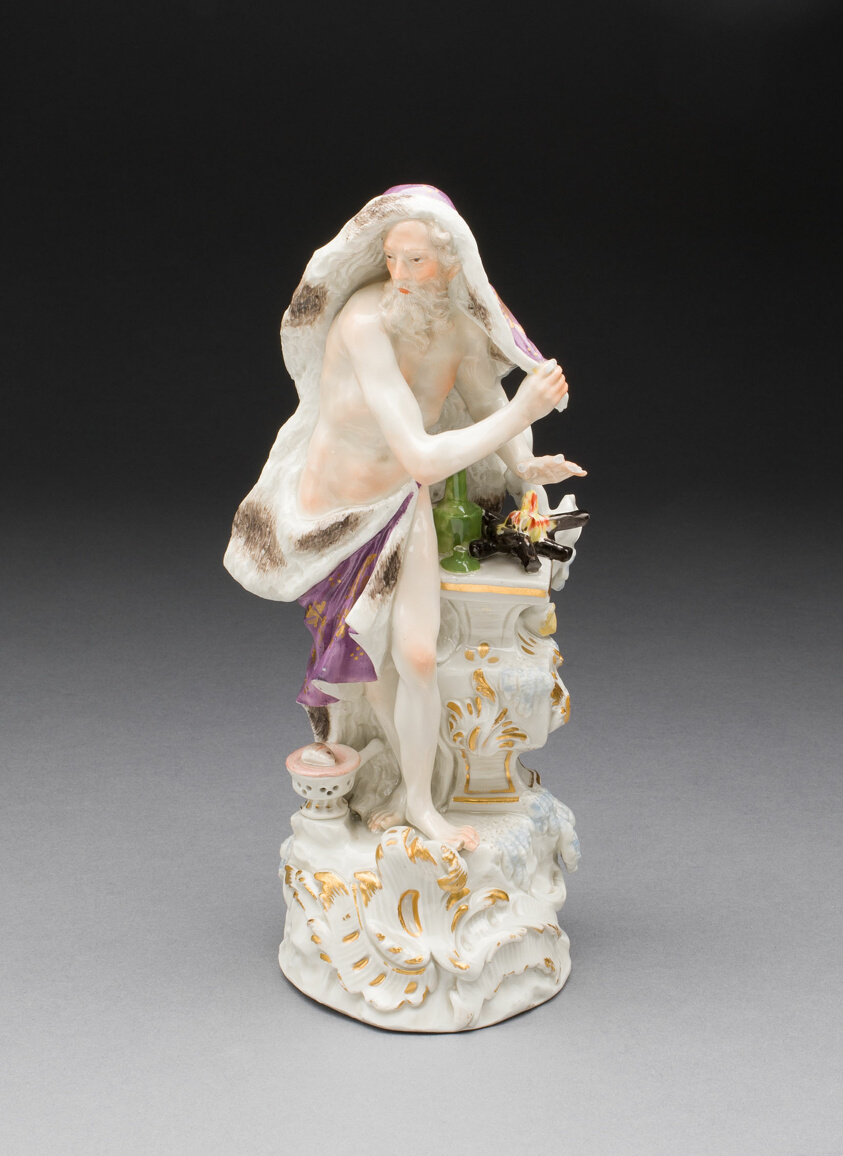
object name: Ceramics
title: Winter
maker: Meissen Porcelain Manufactory; German, founded 1710; Model by: Meyer, Friedrich Elias; German, 1723-1785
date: c. 1755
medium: Hard-paste porcelain, polychrome enamels, and gilding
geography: Meissen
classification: sculpture; porcelain; european decorative arts; ceramics